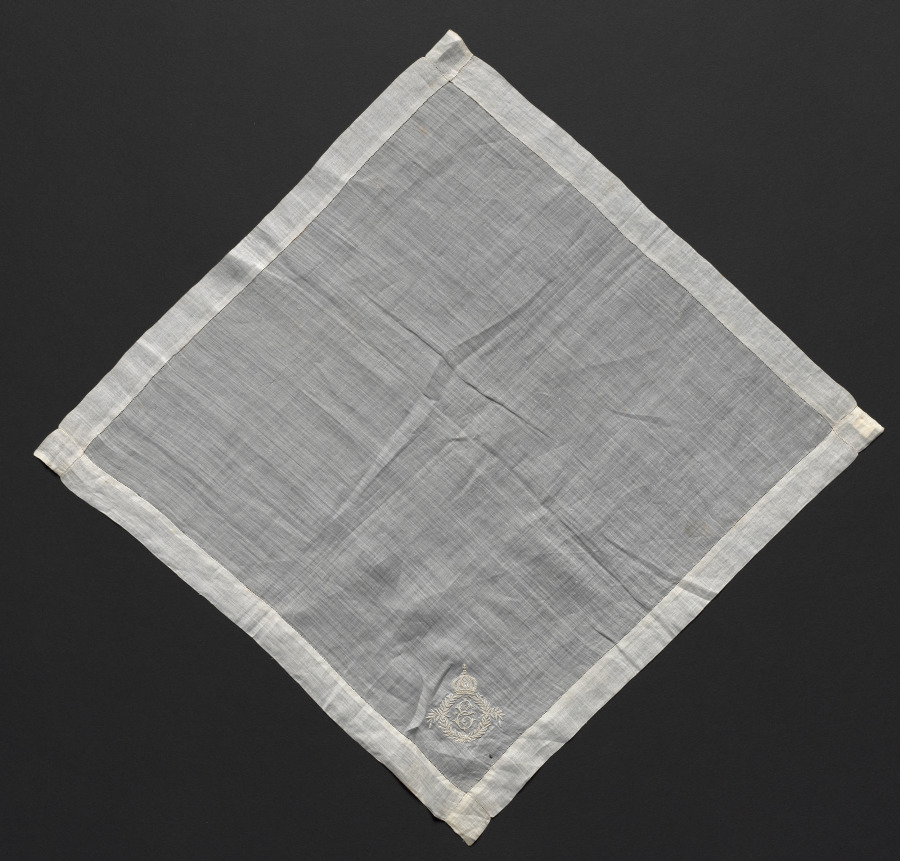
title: Handkerchief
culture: France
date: 1800s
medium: linen: embroidery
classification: Embroidery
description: There is an initial E (for Empress Eugenie) and a crown embroidered in one corner of this handkerchief.